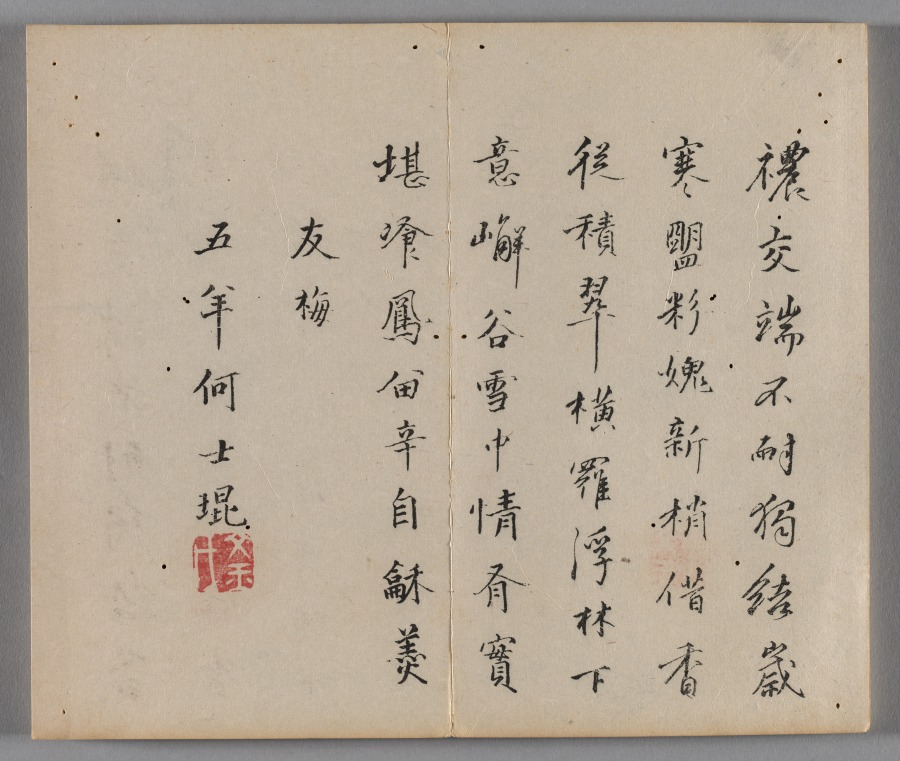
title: Ten Bamboo Studio Painting and Calligraphy Handbook (Shizhuzhai shuhua pu): Bamboo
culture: China, Qing dynasty (1644-1911)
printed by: Hu Zhengyan (Chinese, c. 1584–1674)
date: 1633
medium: Woodblock-printed book; ink and colors on paper; first edition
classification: Print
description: Color printing reached a level of perfection in the early 1600s, as seen in this Ten Bamboo Studio Collection of Calligraphy and Painting and the Mustard Seed Garden Manual of Painting (printed 1679 and 1701). The painterly quality, precision in registering (aligning) the woodblocks, and harmonious colors made them the most successful color print editions in Chinese history. Both editions were printed and compiled in Nanjing, spread nationwide, and had a great impact on the arts in Japan and Korea.